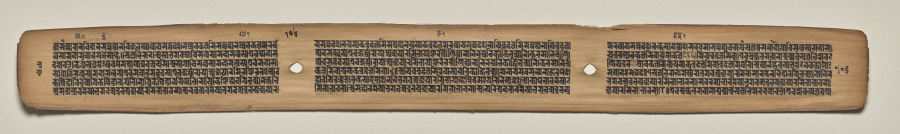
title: Text, Folio 106 (verso), from a Manuscript of the Perfection of Wisdom in Eight Thousand Lines (Ashtasahasrika Prajnaparamita-sutra)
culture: Eastern India, Bihar, Vikramashila Monastery. Painting: Nepal, Kathmandu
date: Sunday, September 14, 1119 (year 239 of the Newar Samvat in the month of Ashvina)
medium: gum tempera and ink on palm leaves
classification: Painting